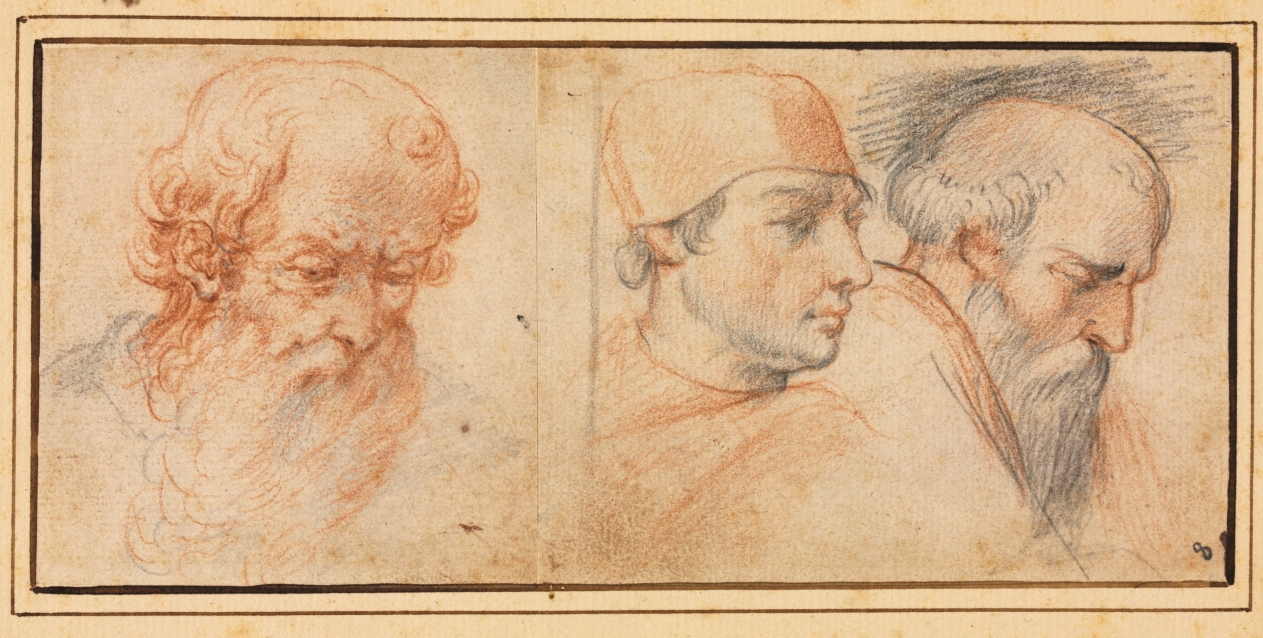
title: Three Head Studies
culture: Italy, 17th century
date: 1600s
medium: red and black chalk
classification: Drawing